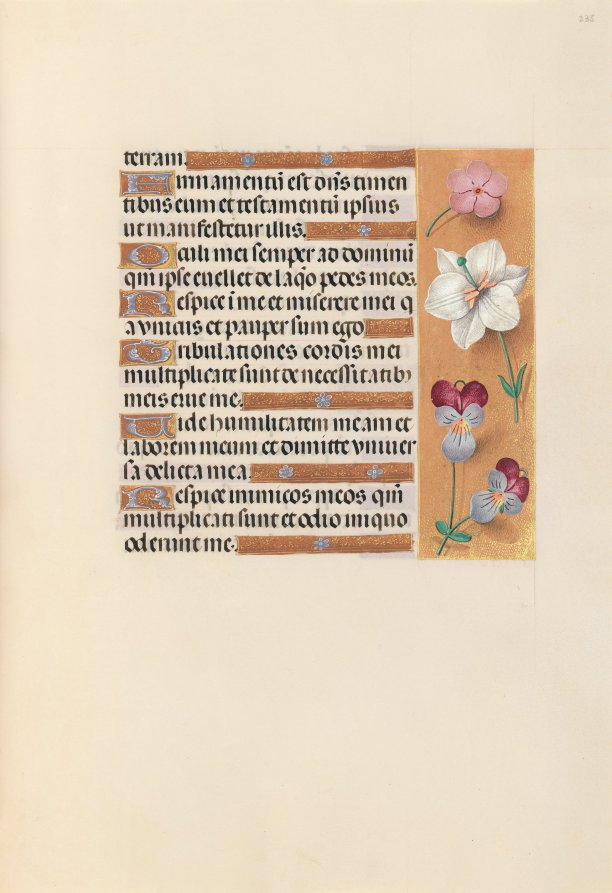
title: Hours of Queen Isabella the Catholic, Queen of Spain: Fol. 235r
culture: Flanders, Ghent and Bruges, late 15th century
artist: Master of the First Prayerbook of Maximillian (Flemish, c. 1444–1519)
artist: and Associates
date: c. 1500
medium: ink, tempera, and gold on vellum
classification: Bound Volume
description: This manuscript was illuminated by a circle of at least five highly organized manuscript painters active in the Flemish cities of Ghent and Bruges. The principal illuminator was Alexander Bening, who painted the majority of the book's miniatures. Manuscripts produced by this circle of artists are renowned for the decoration of their borders, which typically feature a rich variety of realistically-painted flowers, birds, and butterflies. This prayer book, called a book of hours, was intended not for a cleric, but for the private devotions of a lay person-in this case, Isabella the Catholic, Queen of Spain (1451-1504). Isabella's coat of arms embellishes the book's frontispiece. It is unlikely that the book was commissioned by the Queen herself; rather, she probably received it as a diplomatic gift from someone courting her patronage, perhaps Cardinal Francisco Jimenez de Cisneros. A Franciscan friar, Jimenez was dependent upon Isabella for his advancement, first to the post of Queen's confessor in 1492, and then to Archbishop of Toledo in 1495.